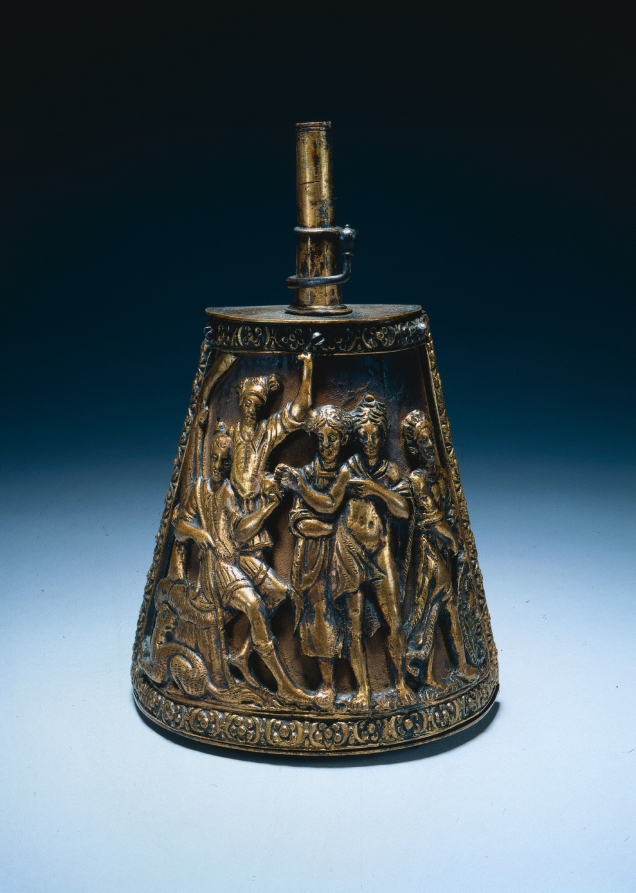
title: Powder Flask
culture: Italy, 16th century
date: c. 1590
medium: gilt brass over fabric covered wood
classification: Arms and Armor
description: Luxury powder flasks served as highly visible badges of ranks. Many highly decorated flasks, like this example, embody all the allure and characteristics of a work of art. This flask depicts an ancient Greek story in which the youthful Paris must reward the most beautiful woman in the world with a golden apple.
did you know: This powder flask depicts a mythological scene that precipitated the Trojan War. Here we see the Trojan prince Paris giving a golden apple to Aphrodite, the goddess who reciprocates by offering him the most beautiful woman in the world, Helen of Sparta.